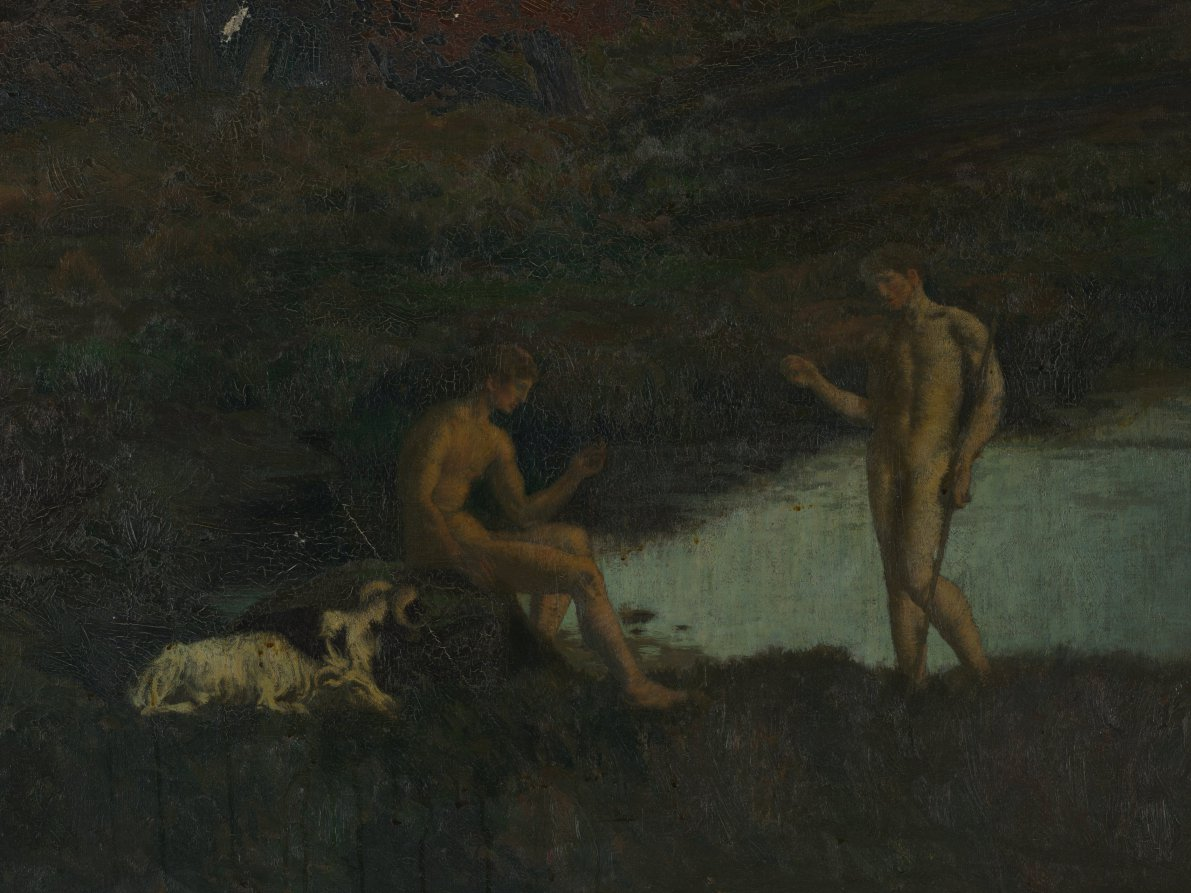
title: Pastoral Scene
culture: France, 20th century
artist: René Ménard (French, 1862–1930)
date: 1911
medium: oil on fabric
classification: Painting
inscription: Signed in lower right: E. R. Ménard 1911